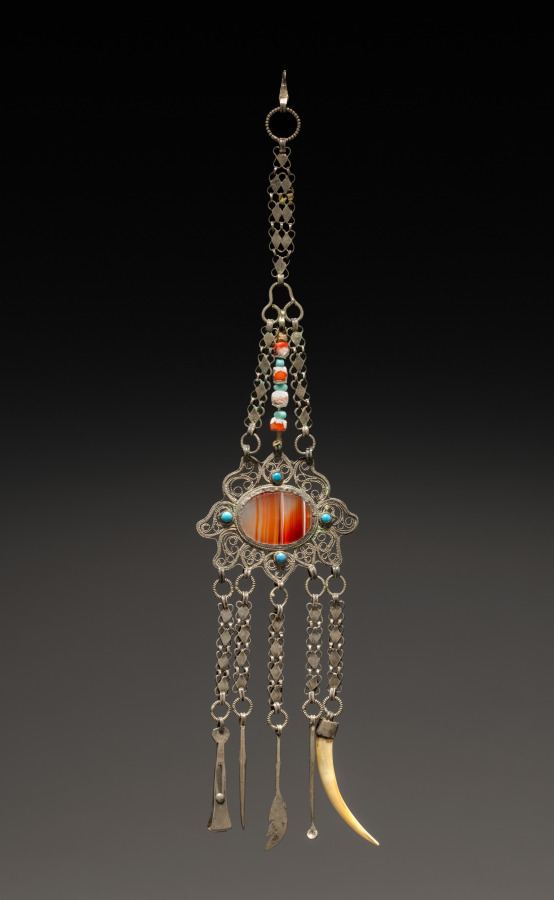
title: Chatelaine with Toilet Articles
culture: Tibet(?)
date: 1800s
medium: silver with cornelian and blue stones with blue and coral beads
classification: Jewelry